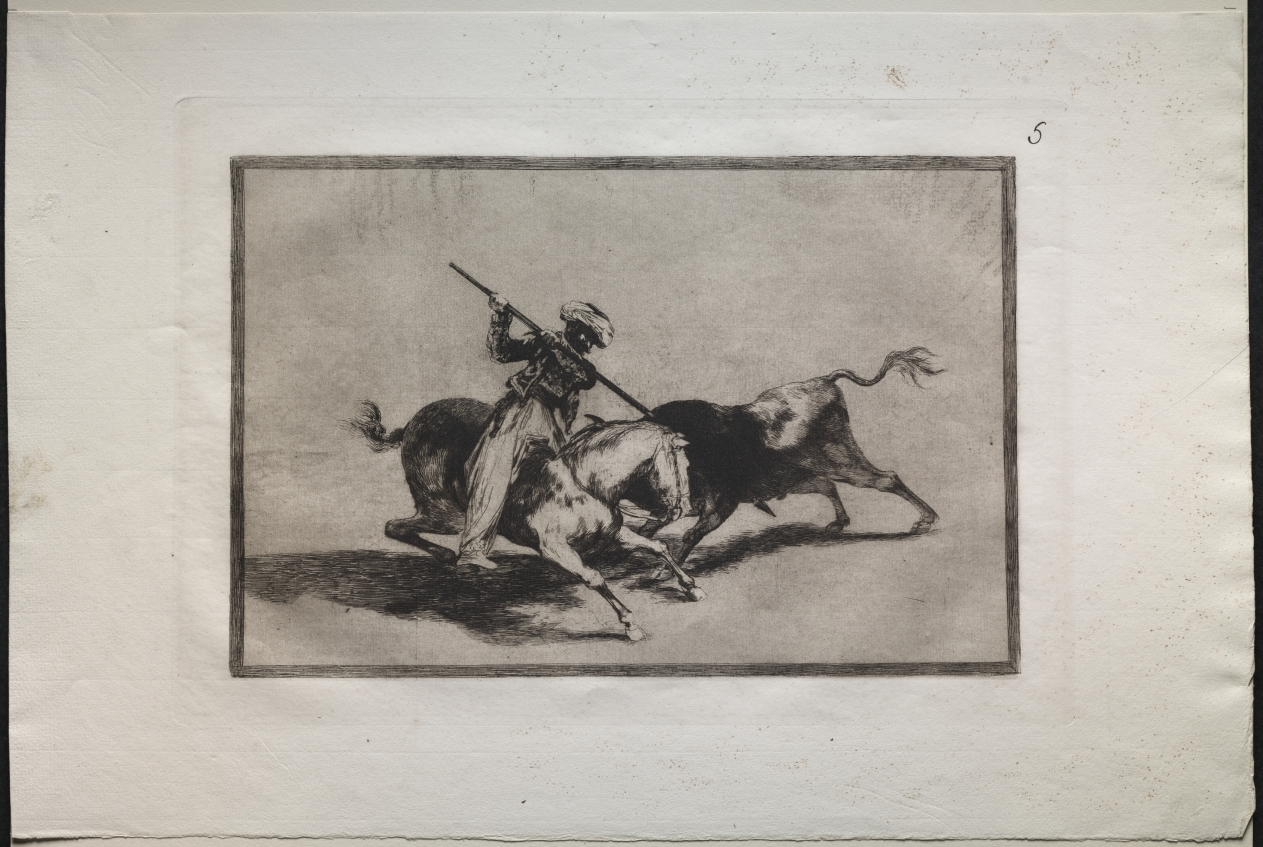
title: Bullfights: The Spirited Moor Gazul is the First to Fight According to the Rules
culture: Spain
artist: Francisco de Goya (Spanish, 1746–1828)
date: 1816, printed 1876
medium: engraving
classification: Print